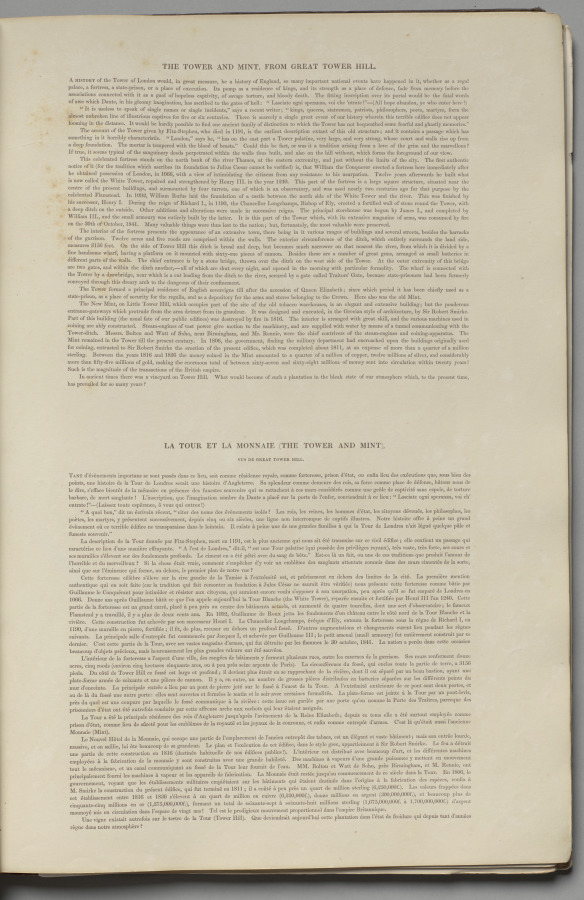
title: London As It Is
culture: England, 19th century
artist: Thomas Shotter Boys (British, 1803–1874)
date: 1842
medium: lithograph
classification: Bound Volume